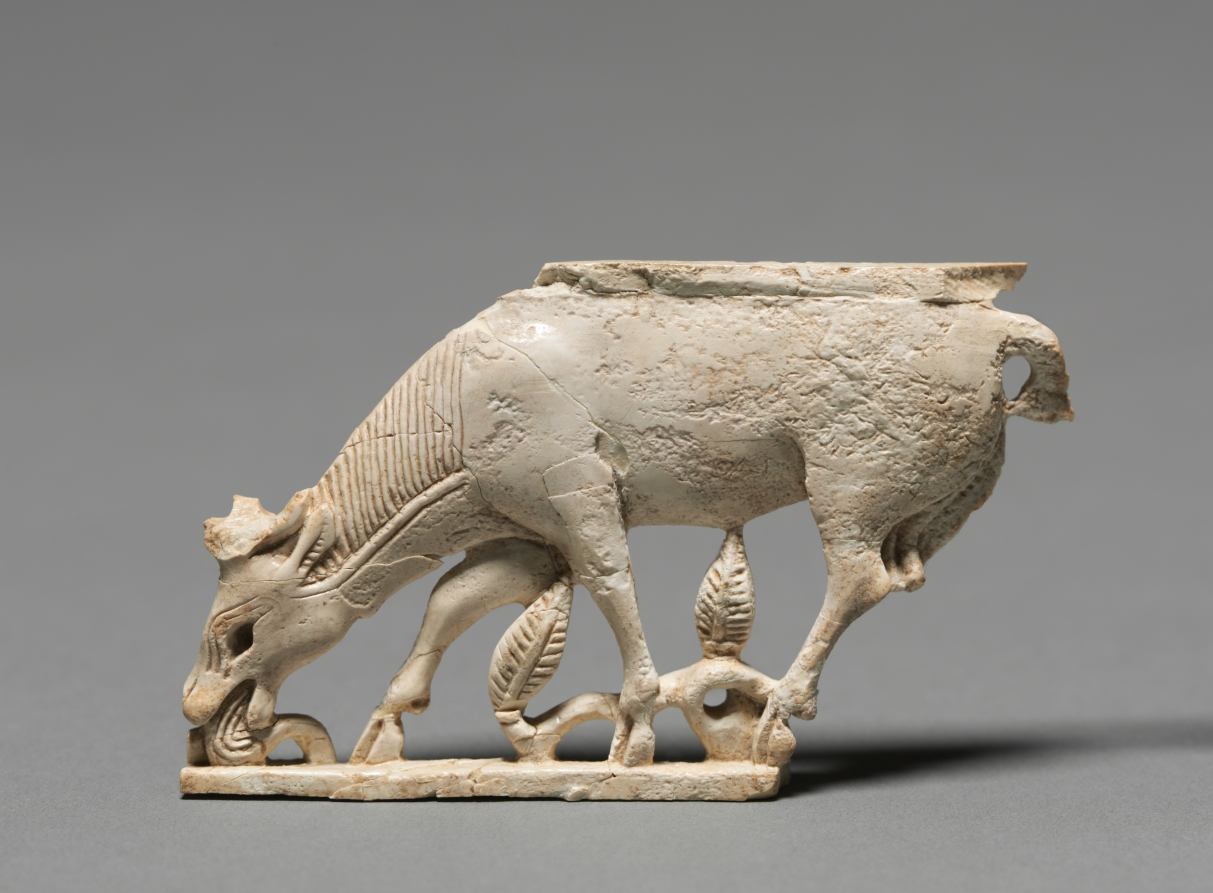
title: Decorative Plaque: Browsing Stag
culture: Phoenicia, Iraq, Nimrud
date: 900–800 BCE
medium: ivory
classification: Ivory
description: This small plaque was executed in the Phoenician style with symmetrical compositions, elongated figural proportions, and Egyptian subjects and motifs. Examples have been found throughout the Middle East, but thousands come from Nimrud where most were excavated in the storerooms of a military arsenal built by King Shalmaneser II (858-824 bc). When the Nimrud palace was sacked in the 7th century bc, these ivories were thrown into a well, where Sir Max Mallowan (the husband of Agatha Christie) discovered them in 1951. The monumental wall relief (1943.246) was found at the same Assyrian palace at Nimrud.